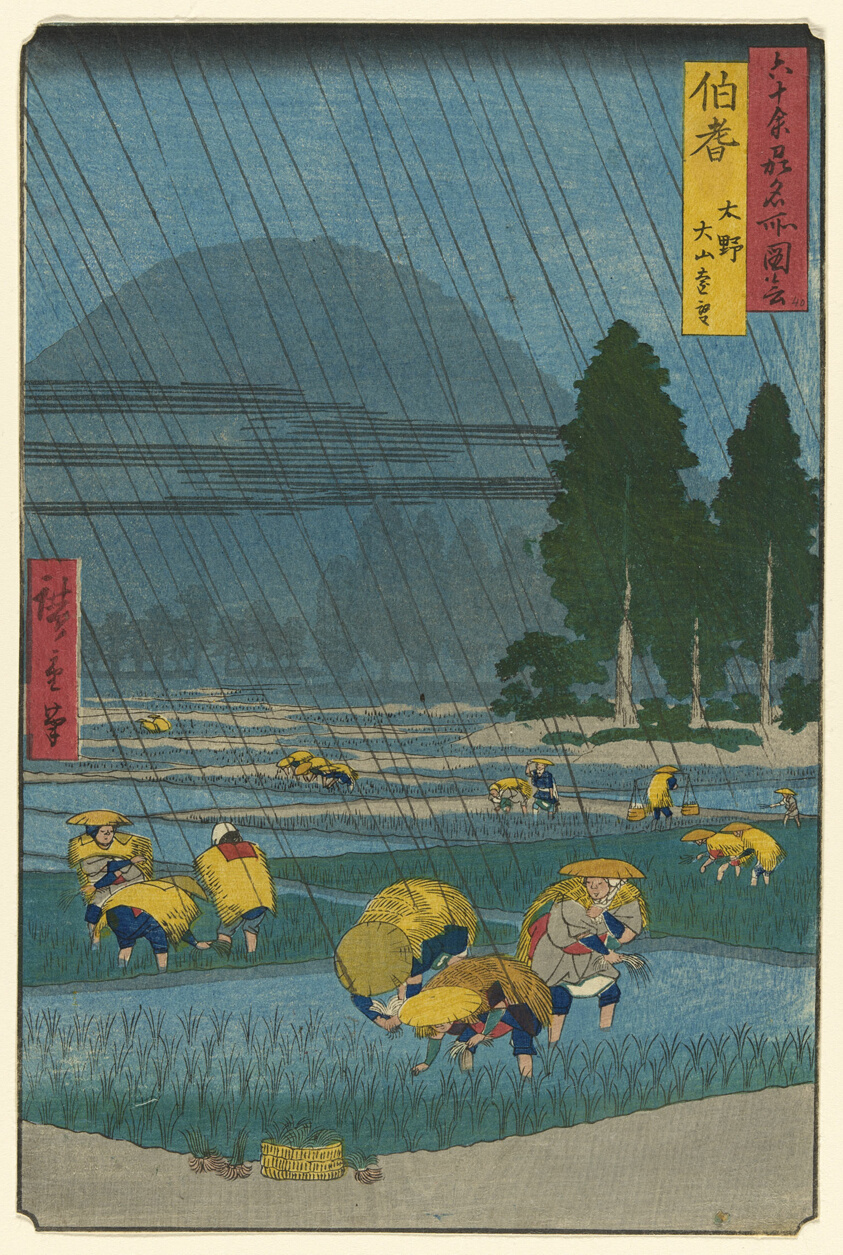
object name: Print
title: Ono, Distant View of Mount Daisen in Hoki Province (Hoki, Ono, Daisen enbo), from the series "Famous Places in the Sixty-odd Provinces (Rokujuyo-shu meisho zue)"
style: Japanese (culture or style)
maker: Utagawa Hiroshige 歌川 広重; Japanese, 1797-1858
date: 1853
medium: Color woodblock print; oban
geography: Japan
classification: woodblock print; print; asian art